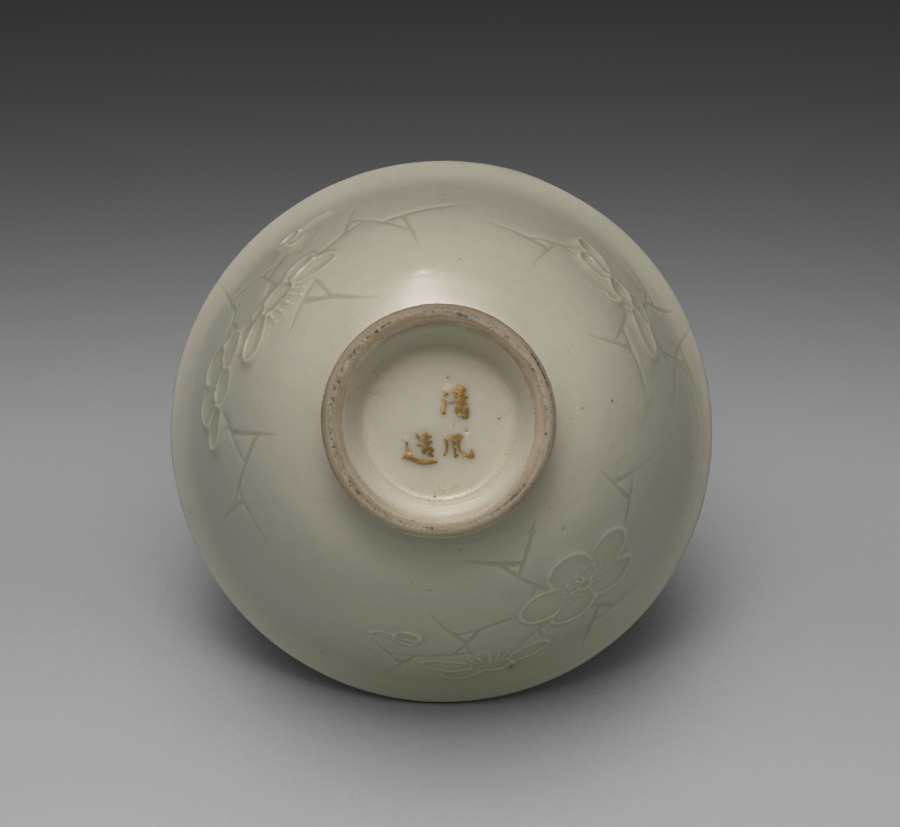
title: Bowl from Dining Set with Plum Blossoms and Cracked-Ice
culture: Japan, Meiji period (1868–1912)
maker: Seifū Yohei II (Japanese, 1844–1878)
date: c. 1875–78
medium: Porcelain with molded designs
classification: Ceramic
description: Each item in this set has a delicate low-relief design of flowering plum branches over scattered, intersecting lines meant to resemble the cracked-ice surface of a frozen body of water and is signed on the base in gold pigment. While Yohei II produced many fine works in underglaze blue, like those produced by Kiyomizu Shichibei, he also made works in quite different styles later in his career, from the early 1870 s. In 1873, he was appointed purveyor to the Industrial Center of Kyoto Prefecture, a designation associated with Kyoto’s efforts to reach an international market through the port of Kobe; and from 1875 until his death, he was involved in national-level projects to present Japanese ceramics across the world. It was during this period that Yohei III was apprenticed to Yohei II, and it has been suggested that this set may in fact be an early example of Yohei III’s work, which he signed with his teacher’s name. Decorated with flowers resembling Japanese textile motifs, the set calls to mind the design of Yohei II’s pair of vases with plum blossoms in the Victoria and Albert Museum. Here, the elaborate trees created for a formal public exhibition setting have been translated into the approachable blossoms of the genteel domestic environment. While the designs are consistent across the pieces, each raised flower petal and pistil and each incised line in the ice was done by hand, so the cups, bowls, and dishes are similar yet unique. The bottoms of two boxes once identified the set’s owner, but the information has been deliberately obscured with black ink. However, inscriptions still visible appear to indicate two occasions, once at the end of July 1886 , and once again in June 1916 , when parts of the set were requested from Hokura in Niigata Prefecture. The location corresponds to a neighborhood in the present-day city of Jōetsu. The surname Tsuji 辻 also appears on a paper tag affixed to one of the box cloths. Future research may possibly reveal more about their provenance. A vase by Yohei III in a private collection combines the formal grandeur of the Yohei II vases in the Victoria and Albert Museum with the gentler design of this dining set, placing flowering plum trees against soft, scalloped-edge clouds resembling those in golden screens.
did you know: The dining wares have a creamy white coloration that the four boxes containing them identify as Korean in style.